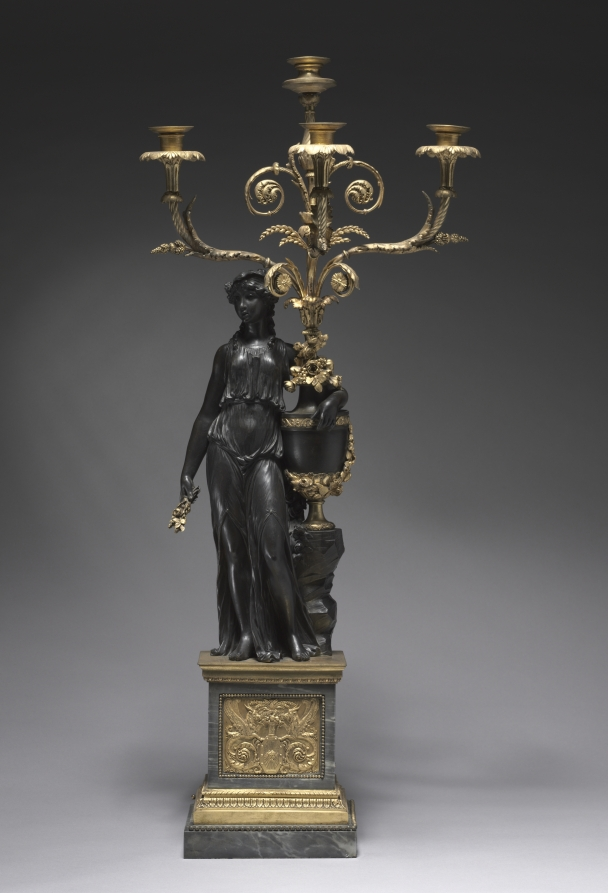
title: Candelabrum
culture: France, 18th century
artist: attributed to Pierre Philippe Thomire (French, 1751–1843)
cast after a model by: Clodion (French, 1738–1814)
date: c. 1780–1785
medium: bronze, gilt bronze, gray marble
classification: Sculpture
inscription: signed behind rock: CLODION.